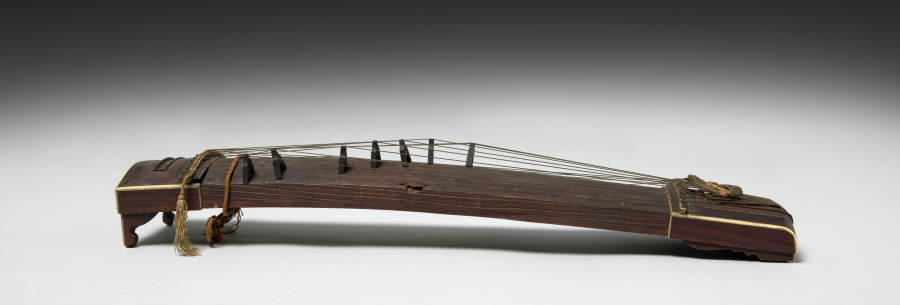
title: Koto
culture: Japan, Edo period (1615–1868)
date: early to mid-1800s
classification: Musical Instrument